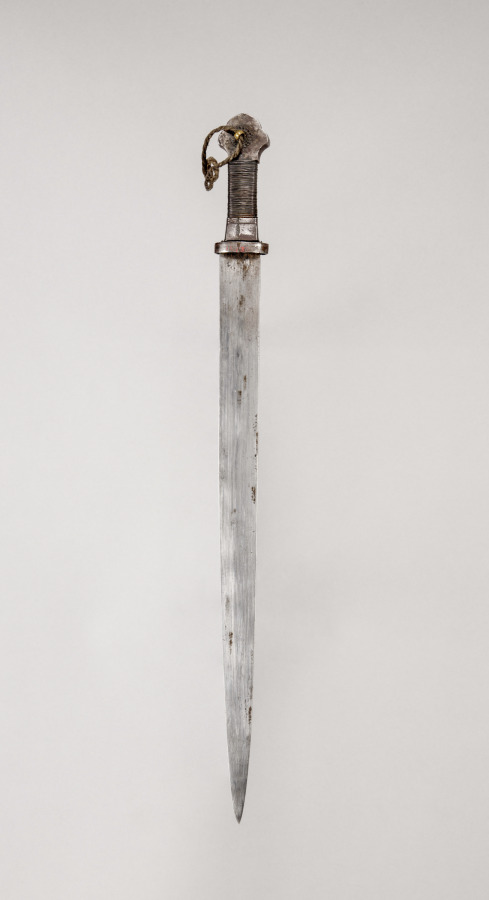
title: Sword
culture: India, Bhutan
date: 1800s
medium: iron with gilt and leather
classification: Arms and Armor